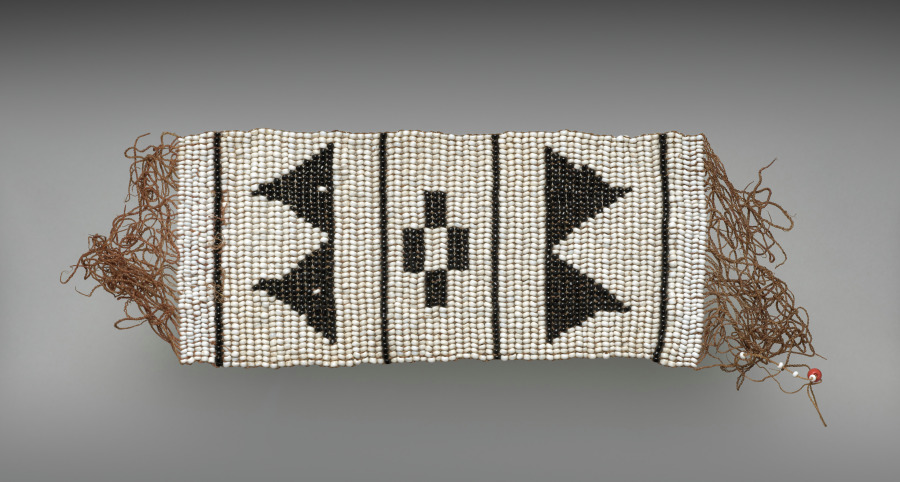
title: Royal ceremonial beadwork: anklet (izitsaba)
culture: Africa, Southern Africa, South Africa, Southeast Cape Region, Unknown female Xhosa-style maker(s)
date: 1800s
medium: Glass beads and sinew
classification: Mixed Media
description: Elite Xhosa women once wore beaded garments like this on festive occasions. Made almost completely from imported Venetian or Bohemian glass beads, they were overt status symbols. Imported beads functioned as money for the Xhosa between about 1770 and 1829. These garments’ female maker carefully selected beads of the highest quality, uniform in color, shape, and size. Made in the same shape as the pendant, a swallowtail-shaped apron (CMA 2010.206) worn under the skirt completed the ensemble.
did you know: The beads to make an ensemble like this cost several cattle in the early 1800s, an amount most couldn't afford.